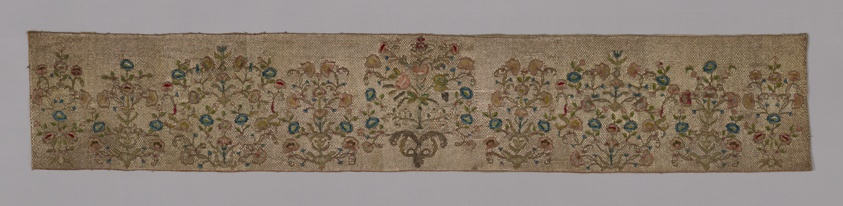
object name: Religious/Ritual Object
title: Altar Back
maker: France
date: 19th century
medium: Embroidered in silver and gold metal wrapped fiber cord, silver frisé, silk floss, silk plain weave fabric for appliqué, twisted silk (2-ply), lining "silver purl" silver "plate", cord; couching in pattern over cord, couching; satin, long and short, stem, and couched filling stitches; French knot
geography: France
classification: textile; liturgical; needlework (visual works); ritual objects